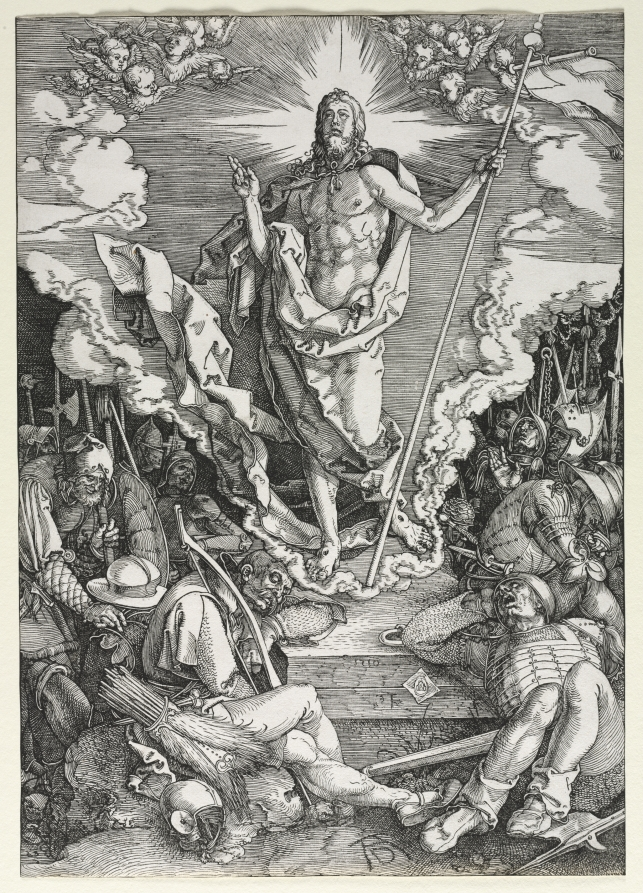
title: The Resurrection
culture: Germany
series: The Great Passion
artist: Albrecht Dürer (German, 1471–1528)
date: 1510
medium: woodcut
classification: Print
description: This print belongs to a group of woodcuts showing the events of Christ’s Passion. The series was published with Latin verses on the back of each sheet, but this particular impression was printed as a “proof” before the text was added. Here, Albrecht Dürer showed Christ emerging from his tomb while the soldiers assigned to guard him sleep. Christ’s muscular, heroic body demonstrates Dürer’s awareness of visual models from the classical past and from Italy, a knowledge he helped to spread in the north through prints such as this. Here, the ideal body of Christ represents his resurrected state.